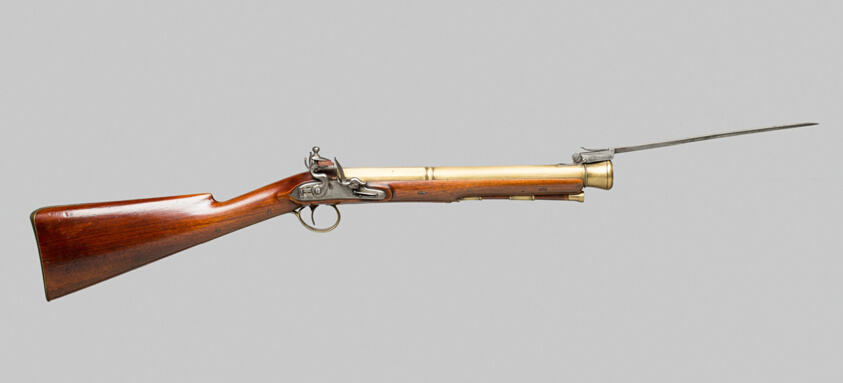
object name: Arms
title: Flintlock Blunderbuss with Spring-Bayonet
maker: English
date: 1820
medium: Brass, steel, walnut, and oak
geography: England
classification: firearm-long gun; arms; arms and armor